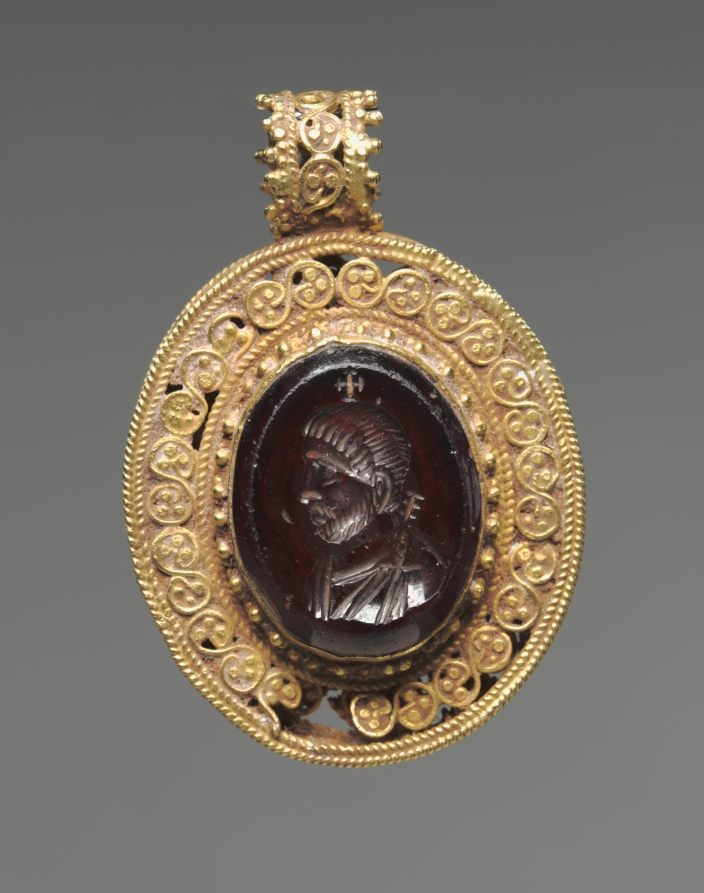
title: Pendant with Portrait Intaglio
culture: Byzantium, early Byzantine period, 6th century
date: 500s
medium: garnet with gold filigree setting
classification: Glyptic